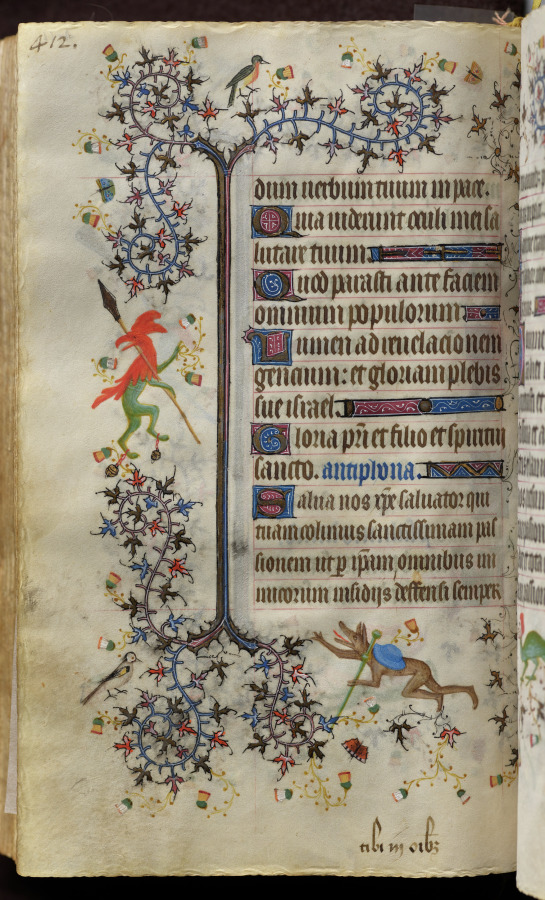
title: Hours of Charles the Noble, King of Navarre (1361-1425): fol. 200v, Text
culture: France, Paris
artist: Master of the Brussels Initials and Associates (French)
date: c. 1405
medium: ink, tempera, and gold on vellum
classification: Bound Volume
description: This precious volume was obviously highly prized by its owner, the French-born King of Navarre, who had his coat of arms painted on no less than twenty folios. Rather than directly commissioning this manuscript from a specific workshop, it seems that Charles the Noble acquired his book of hours -- perhaps ready-made for the luxury market -- while on a trip to Paris in 1404-05. A collaborative effort, six painting styles are evidenced within the pages of this codex, those of two Italians, two Frenchmen, and two Netherlanders. The painter who was responsible for the planning and decoration of the book, and who produced seventeen of the large miniatures, was a Bolognese artist known as the Master of the Brussels Initials. His principal assistant, responsible for most of the borders, was a Florentine who signed his name "Zecho" da Firenze on folio 208 verso.